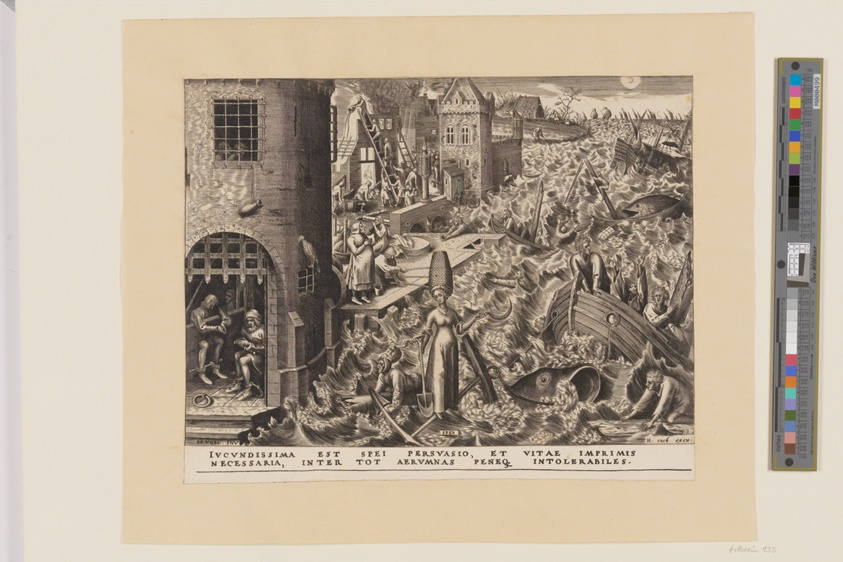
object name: Print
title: Hope, from The Seven Virtues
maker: Philip Galle (Flemish, 1537–1612); after Pieter Bruegel, the elder (Flemish, c. 1525–1569); published by Hieronymus Cock (Netherlandish, c. 1510–1570)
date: 1559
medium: Engraving on ivory laid paper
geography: Flanders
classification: engraving; paper; print; prints and drawing